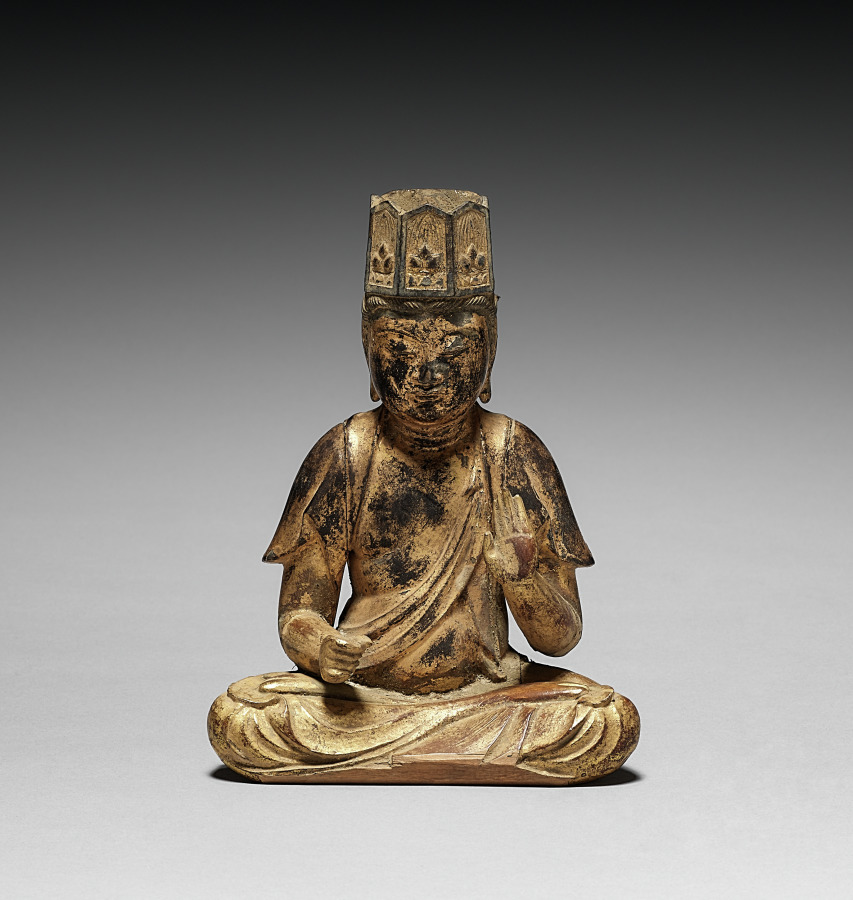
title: Bodhisattva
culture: Japan, Heian period (794–1185)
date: 900s-1100s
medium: gilded wood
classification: Sculpture